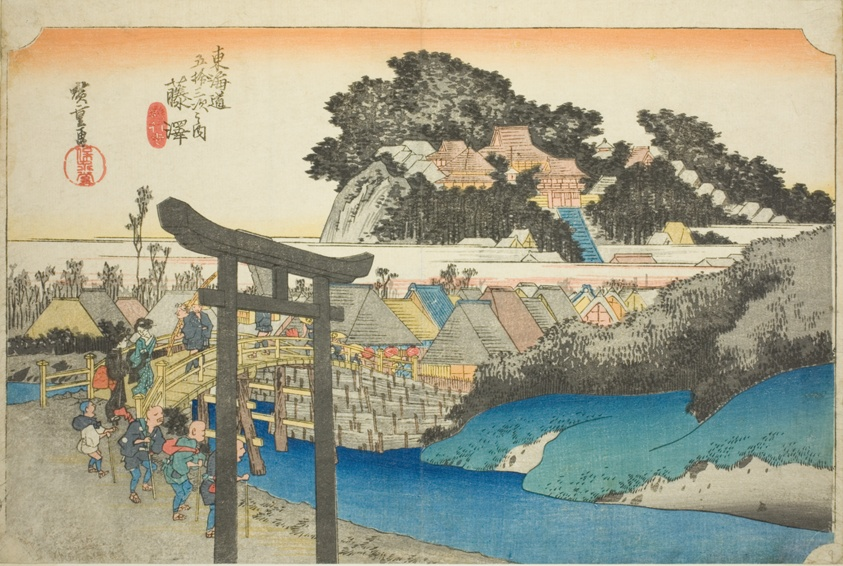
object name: Print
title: Fujisawa: Yugyo Temple (Fujisawa, Yugyoji), from the series "Fifty-three Stations of the Tokaido Road (Tokaido gojusan tsugi no uchi)," also known as the Hoeido Tokaido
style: Japanese (culture or style)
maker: Utagawa Hiroshige 歌川 広重; Japanese, 1797-1858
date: c. 1833/34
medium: Color woodblock print; oban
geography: Japan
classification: woodblock print; print; asian art